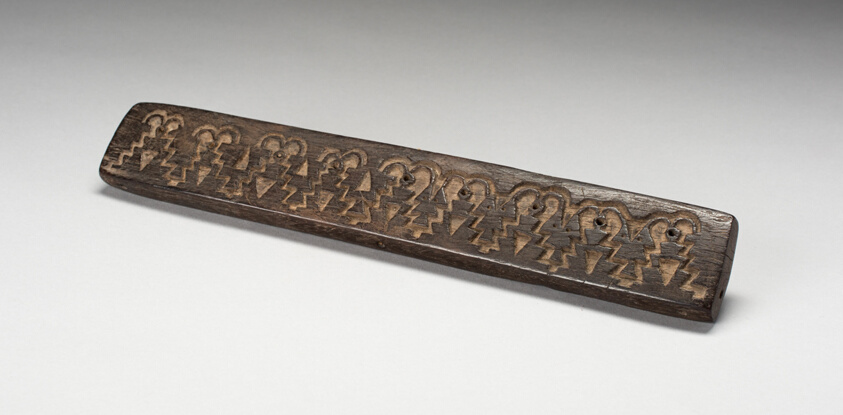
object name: Decorative Arts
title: Balance-Beam Scale Insided with Bird, Fish and Geometric Motifs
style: ica, Arts of the Americas, andean, south american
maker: Possibly Ica; South coast, Peru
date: 1000–1470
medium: Wood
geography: Peru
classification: wood; american decorative arts; tool; decorative arts; art of the americas